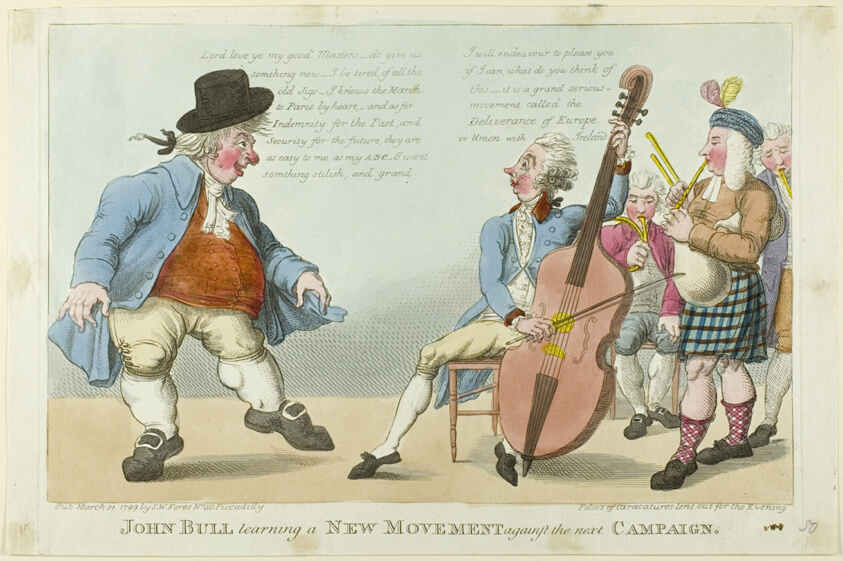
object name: Print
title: John Bull Learning a New Movement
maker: Unknown Artist (English, late 18th-early 19th centuries); published by S. W. Fores (English, active 1785-1825)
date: published March 21, 1799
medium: Hand-colored etching on ivory laid paper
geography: England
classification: etching; print; prints and drawing